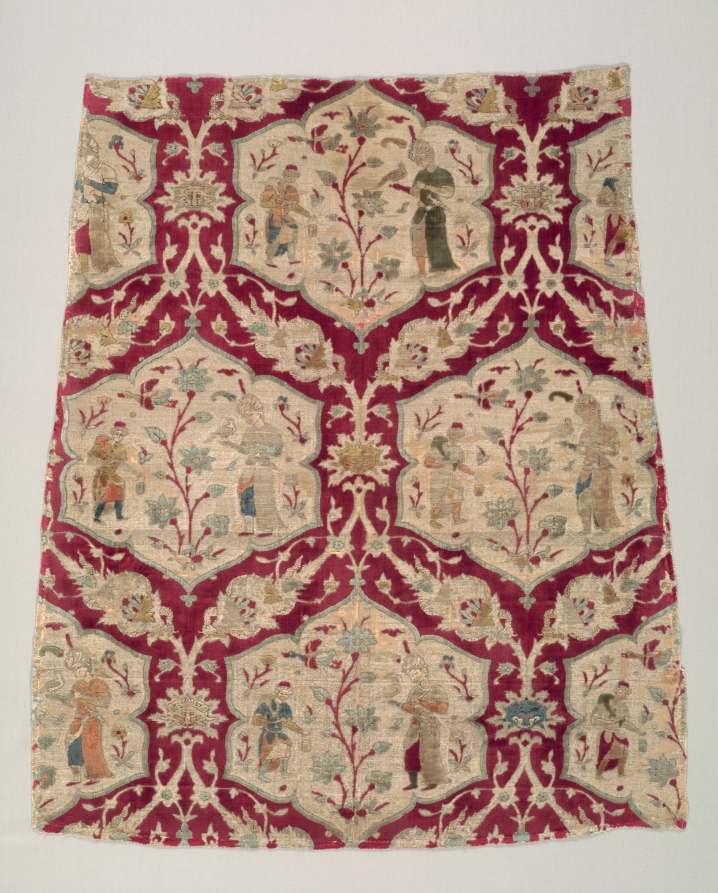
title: Fragment with falconer and attendant in animated lattice, from a robe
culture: Iran, Kashan, Safavid period (1501–1722)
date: mid-1500s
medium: Silk: velvet, brocaded, pile-warp substitution; gilt-metal thread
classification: Velvet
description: This velvet of Iran’s Safavid period (1501–1722) displaying a falconry scene is celebrated for its refined beauty and meticulous draftsmanship. A falconer and attendant flank a blossoming plant on a golden ground of lobed medallions. Animated vines display leaves bearing lion’s masks and dragons coiled around larger leaves on the crimson ground. Instead of two or three colors of velvet, Iranian weavers wove with as many as 14 colors, the most colorful velvets ever woven.